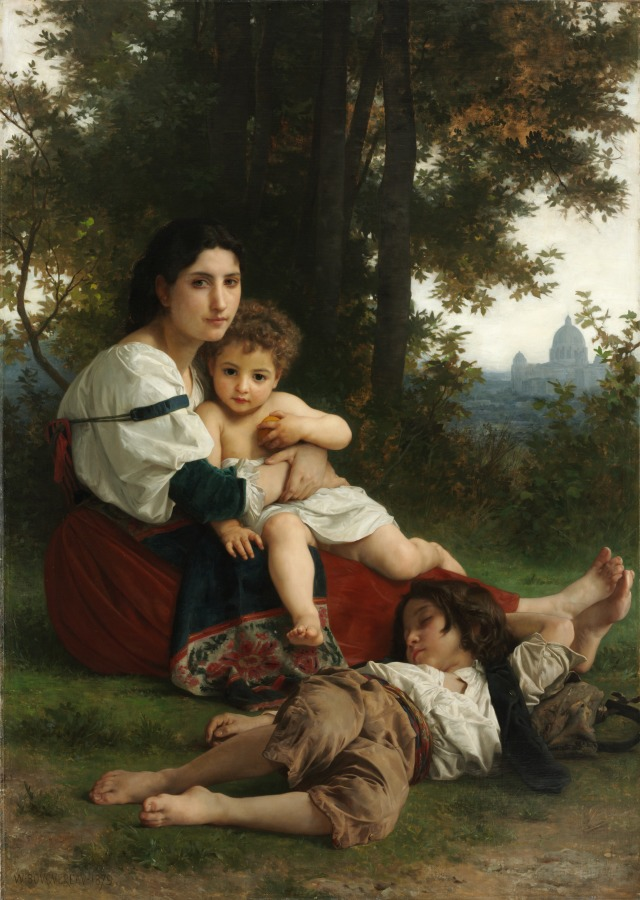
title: Rest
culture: France, 19th century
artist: William Adolphe Bouguereau (French, 1825–1905)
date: 1879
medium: oil on fabric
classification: Painting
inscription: Signed lower left: W. Bouguereau 1879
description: One of the most celebrated academic painters of his time, Bouguereau underscores the moral virtues of the Italian peasants in this painting by depicting the dome of St. Peter's in the distance. The idealized figures and their triangular grouping recall the Holy Family paintings by Renaissance master Raphael 400 years earlier. The painting was purchased directly from the artist by Cleveland banker and philanthropist Hinman B. Hurlbut in July 1879.